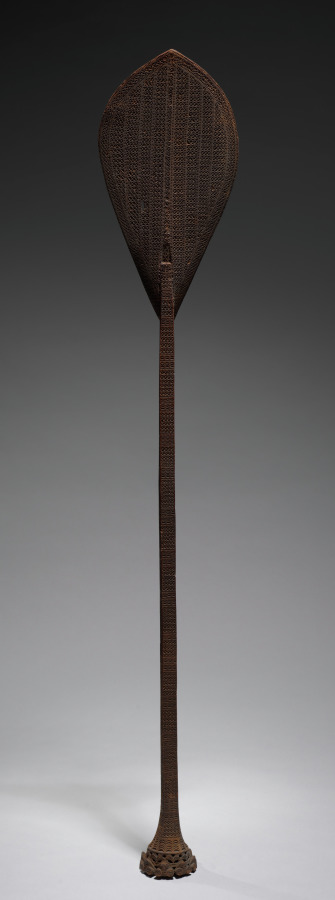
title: Ceremonial Paddle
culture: Polynesia, Ra'ivavae, Austral Islands, 19th century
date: 1800s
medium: wood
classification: Sculpture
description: Fine, chip-carved patterns cover the blades and shafts of Austral Islands ceremonial paddles. Squatting human figures carved around the butt are called tiki tiki tangata, meaning man-gods. The shafts of early paddles are usually round in cross-section; 19th-century examples are sometimes square. The function of the intricately carved Austral Islands paddles is uncertain. They may have been displayed on ceremonial occasions, such as dances, pageants, ancestral rituals, or inaugurations.